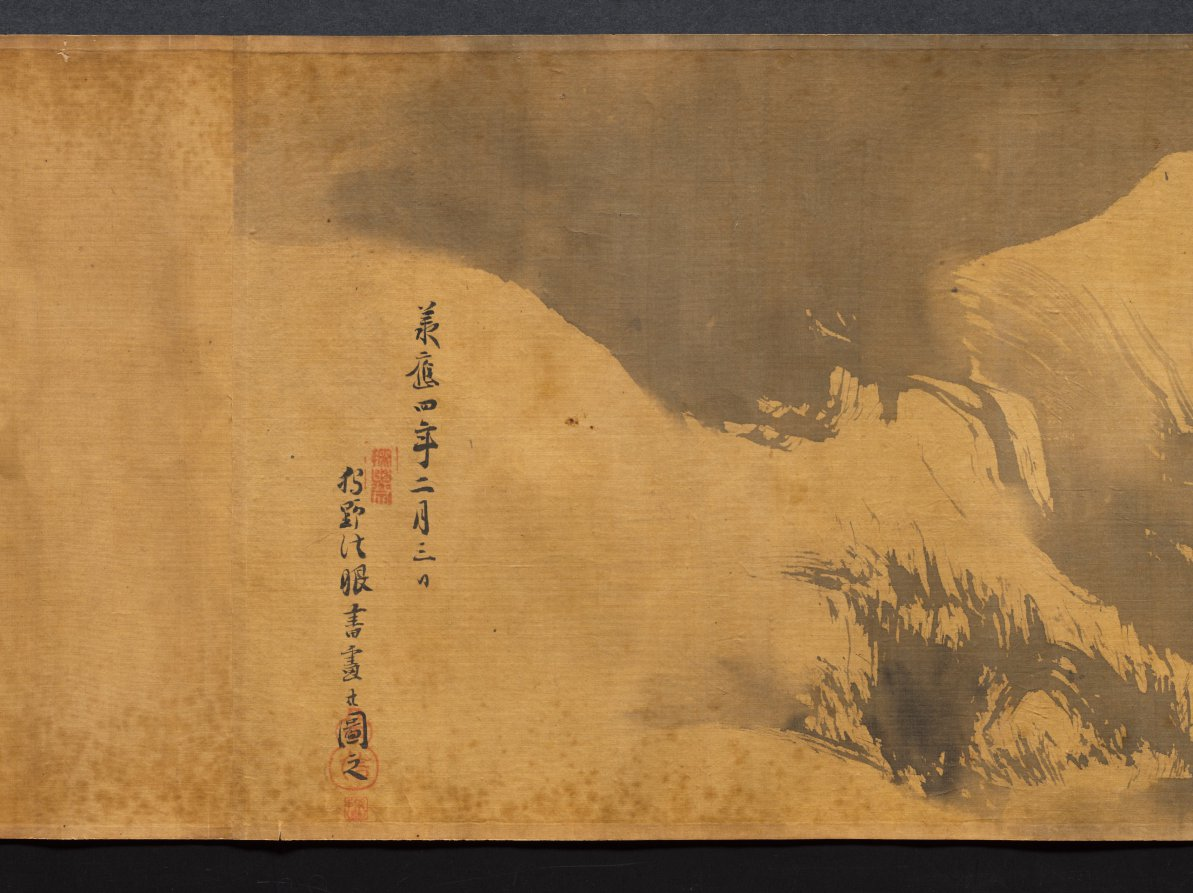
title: Eight Views of Xiao-Xiang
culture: Japan, Edo period (1615–1868)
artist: Kano Tan’yū (Japanese, 1602–1674)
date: 1615–1868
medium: handscroll; ink on silk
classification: Painting